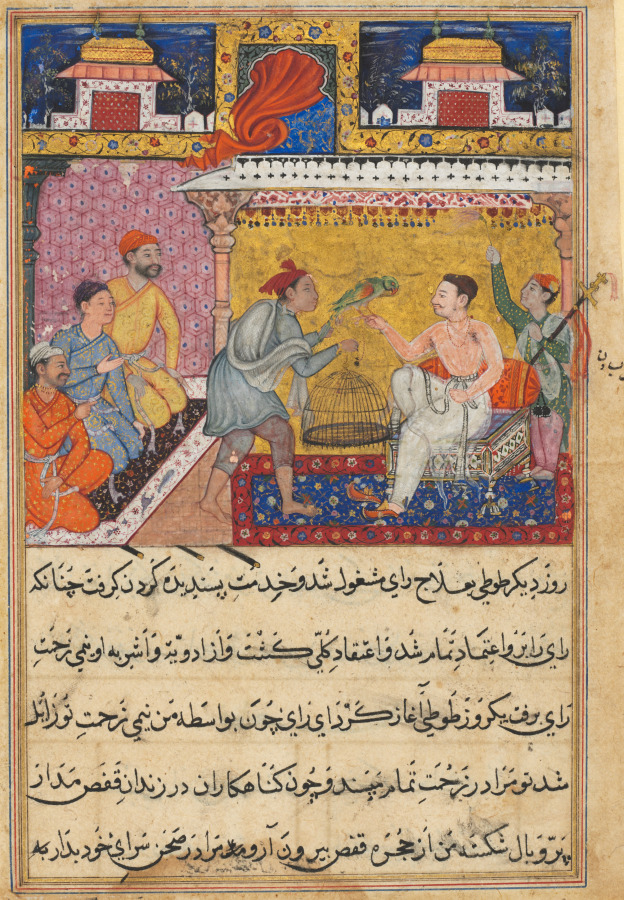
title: The hunter offers the mother parrot to the king of Kamarupa, from a Tuti-nama (Tales of a Parrot): Fifth Night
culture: Mughal India, court of Akbar (reigned 1556–1605)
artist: Basavana (Indian, active c. 1560–1600)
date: c. 1560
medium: gum tempera, ink, and gold on paper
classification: Painting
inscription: 'amal basāwan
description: The king of Kamarupa, which ironically means “body of erotic love,” had leprosy. The hunter brought the captured mother parrot to the king, assuring him that the bird knew a cure. The lavish use of gold indicates that this book was a costly production. The figure of the hunter reveals the talents of the artist Basavana, whose name is written in the right margin. Draped in rustic garments shaded to appear softly flowing, the hunter bends forward with a subtle look of shrewd expectancy as the king seems ready to pay a high price for the parrot. The billowing red curtain is one of Basavana’s signature motifs. Beyond is a tantalizing glimpse of the forest to which the parrot will soon escape to rejoin her children.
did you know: This leper king ruled a territory that stretched from Bhutan to Assam and Bengal.